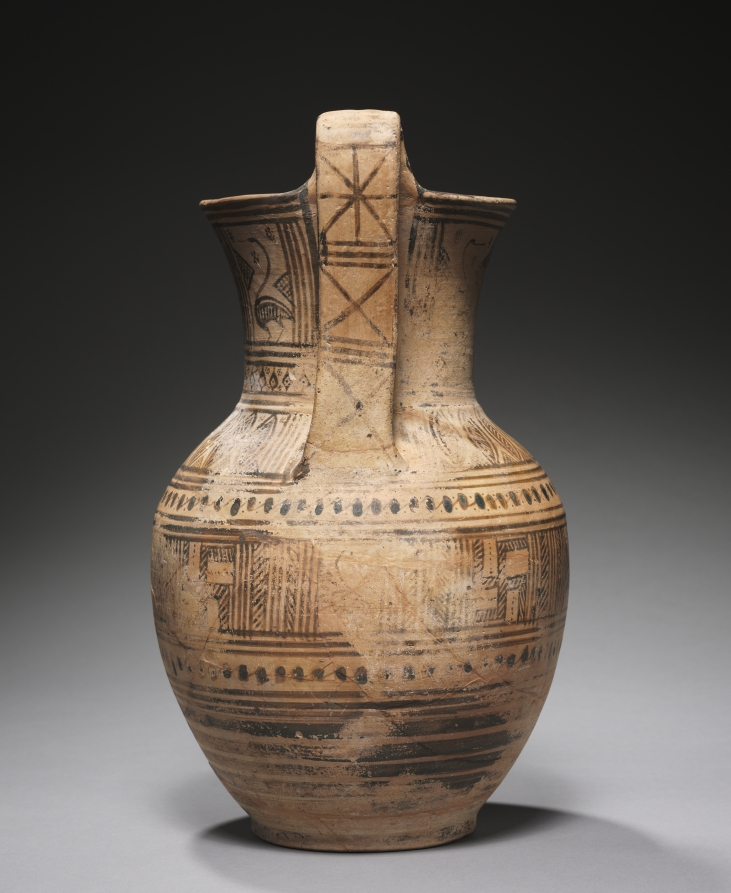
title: Geometric Pitcher: Swans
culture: Greek, Attic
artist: attributed to Swan Painter (Greek, Attic, Late Geometric Ib-IIa)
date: c. 740–730 BCE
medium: ceramic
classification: Ceramic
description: A common shape in the Late Geometric period, the pitcher often attains large dimensions, offering the painter multiple zones for decoration. Here, standing leaves encircle the shoulder, while the neck and body bear wide bands with alternating squares of swans and swastikas. Also known as a hooked cross, the swastika appears frequently as a decorative motif in Greek Geometric pottery, without any clear meaning. The swans, though somewhat abstracted to modern eyes, likely represent one of many waterfowl species native to Greece.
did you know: The stylized swans lend their name to the otherwise anonymous decorator of this vase.